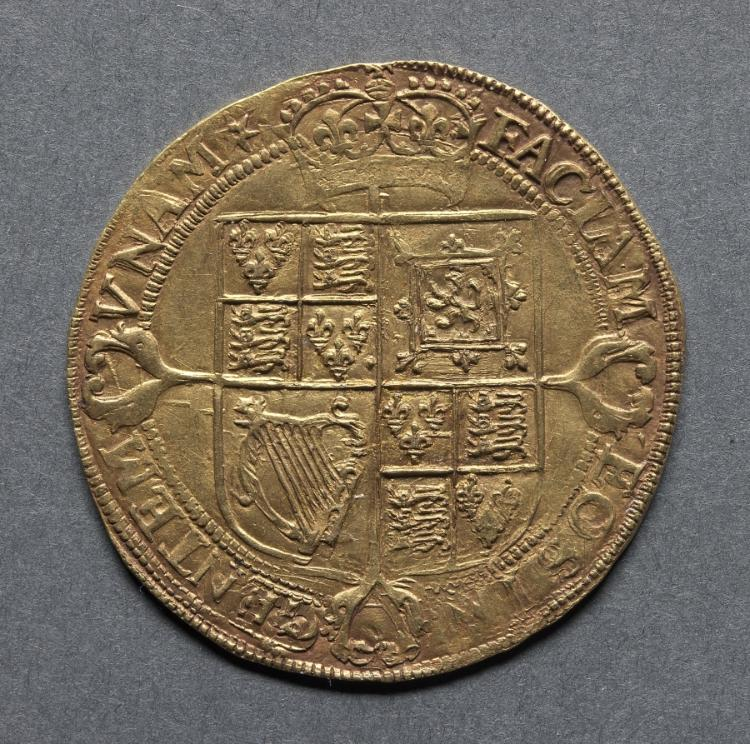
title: Laurel: Crowned Shield of Arms (reverse)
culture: England, James I, 1603-1625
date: 1619–1620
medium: gold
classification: Coins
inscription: FACIAM EOS IN. GENTEM. UNAM